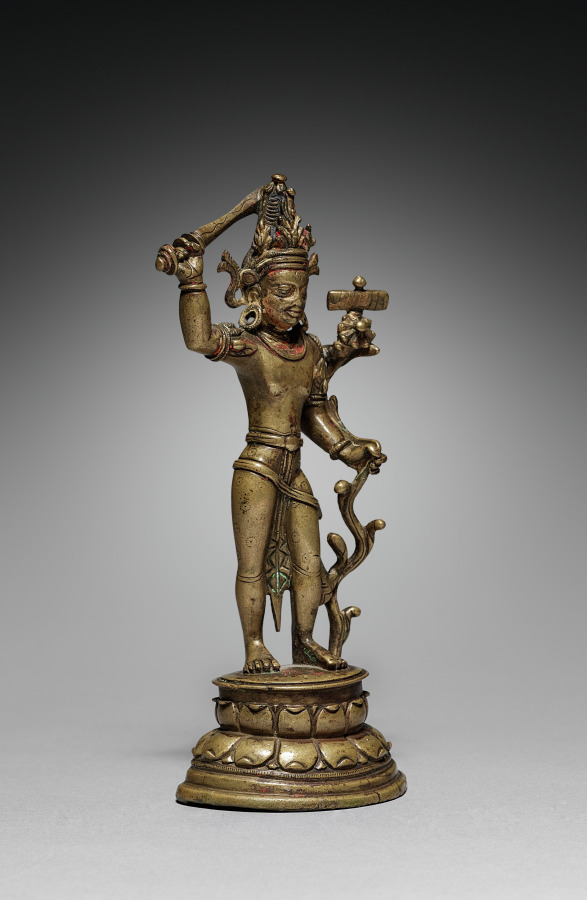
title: Standing Manjusri (Arapacana Form)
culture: India, Pala, 12th-13th century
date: 1100s-1200s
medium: bronze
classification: Sculpture